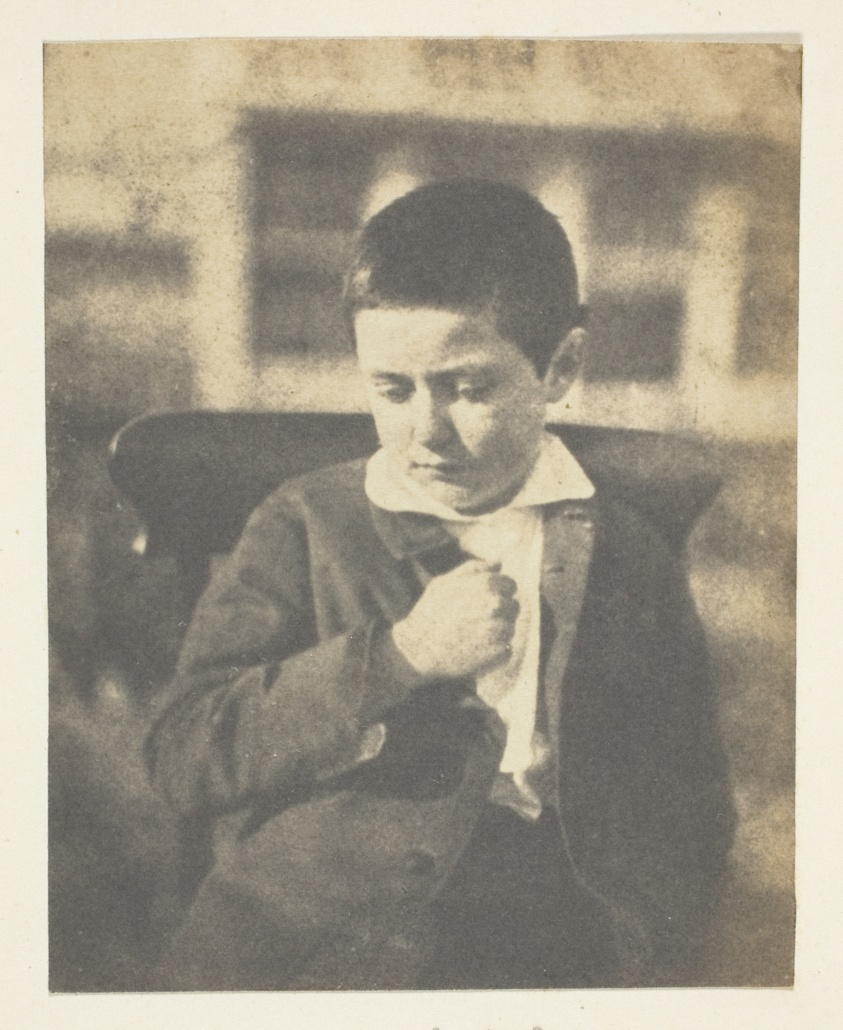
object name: Photograph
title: Son of General Flo, Isle of Jersey (Le fils du général Flô)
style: 19th century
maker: Charles Hugo (French, 1827–1871), Victor Hugo (French, 1802–1885), and; Auguste Vacquerie (French, 1819–1895)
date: c. 1852/53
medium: Salted paper print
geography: France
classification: salted paper print; photographic process; photography; photograph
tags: portraits, portraits: male subject, photography, portraits: child subject